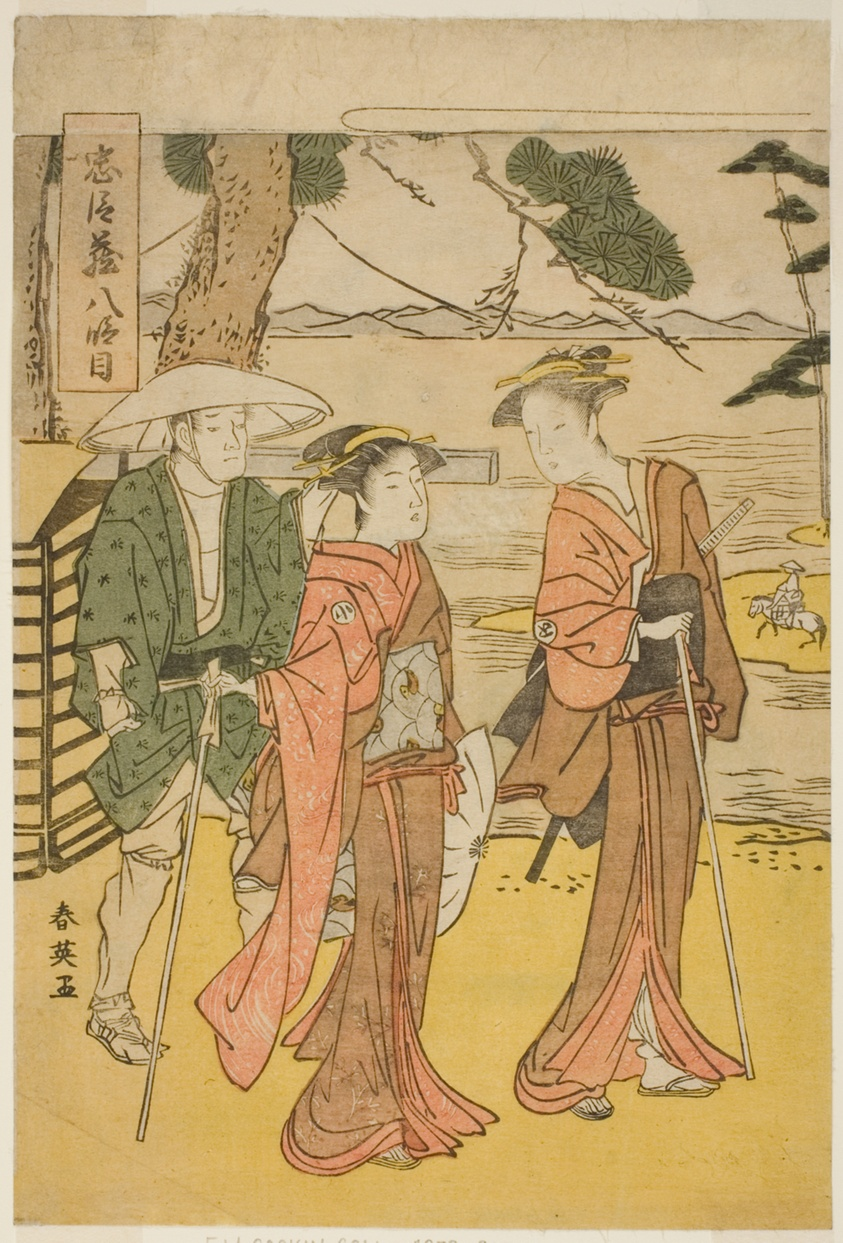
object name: Print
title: Act Eight: The Bridal Journey (Michiyuki) from the play Chushingura (Treasury of the Forty-seven Loyal Retainers)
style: Japanese (culture or style)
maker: Katsukawa Shun'ei (Japanese, 1762-1819)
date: late 1780s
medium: Color woodblock print; koban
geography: Japan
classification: woodblock print; print; asian art